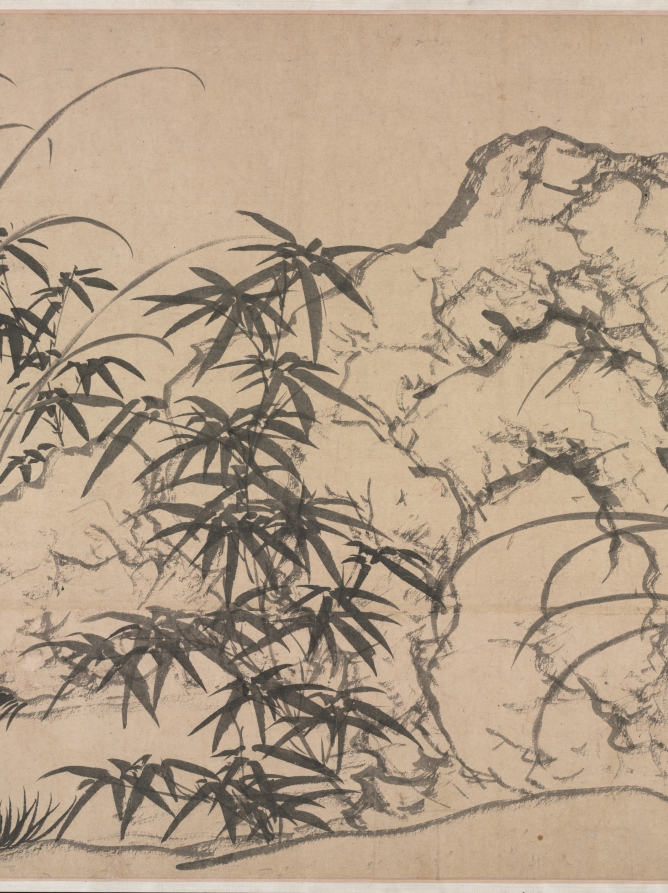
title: Bamboo, Rocks and Lonely Orchids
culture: China, Yuan dynasty (1271-1368)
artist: Zhao Mengfu (Chinese, 1254–1322)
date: 1271–1368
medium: Handscroll; ink on paper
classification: Painting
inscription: 竹石幽蘭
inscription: 孟頫為善夫寫. [印] 趙氏子昂; [印] 松雪齋; [印] 天水郡圖書印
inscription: 古人善書者必能畫點墨作蠅，便自有生意。松雪翁蘭石草聖飛帛筆法皆具，可寶也。安陽韓性 [印]明善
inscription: Colophon 2. Qiu Yuan 仇遠 (1247-after 1328), a respected poet during the Song and Yuan periods. He was linked to, among others, Zhao Mengfu and Gao Kegong. Zhao Mengfu painted a version of Nine Songs 九歌圖 for him, and Gao Kegong dedicated to him a painting titled Mountain Village 山村圖 (current whereabouts unknown). His poem here is also preserved in his collected works.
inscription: Colophon 3. Zheng Yuanyou 鄭元祐 (1292-1364), an erudite scholar and teacher of renown, active in Hangzhou and Suzhou. In the 1350s, when Gu Ying’s literary gatherings were at their peak, he was already elderly and participated in a limited way.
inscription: Colophon 4. Wu Kegong 吳克恭 (active mid-1300s), a friend of Gu Ying and Ni Zan 倪瓚 (1301–1374), a major Yuan painter.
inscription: Colophon 5. Angji 昻吉 (jinshi of 1348), of Western Xia 西夏 origin and a poet of distinction. He wrote an introduction to the painting Literary Gathering at Yushan 玉山雅集圖, of which Zhang Wo was the painter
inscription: Sheet 2. Yuan: friends of Gu Ying Colophon 6. Wang Zifang 王孜方 (active mid-1300s), an official who, at the time of his visits to Gu Ying’s estate, had reached the rank of Minister. He is better known under the name Wang Keju 王可矩.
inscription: Colophon 7. Ke Jiusi 柯九思 (1290–1343), a major official who served in the Kuizhang Pavilion 奎章閣 and as an advisor to Emperor Wenzong in matters of calligraphy and painting.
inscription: Colophon 8. Yu Li 于立 (active mid-1300s), a Daoist recluse, poet, and close friend of Gu Ying, so much so that during his visit to Gu Ying’s estate he was given accommodation in a special pavilion. His poem here is also preserved in Gu Ying’s Cao tang ya ji.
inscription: 至正十一年十月廿八日男奕百拜堇觀 [印] 趙奕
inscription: Colophon 10. Yu Ji 虞集 (1272-1398), a major official and literary figure who also served in the Kuizhang Ge. His poem is recorded in his collected works. The poem is one of a set of four inscribed at the request of Wang Huayu 汪華玉 on Orchids and Rock 蘭石圖 by Zhao Mengfu, obviously a different, long lost, painting. Wang Huayu was an official and a collector (jinshi of 1327). Yu Ji’s colophon here was written before 1348 and during his retirement in Linchuan 臨川, Jiangxi, possibly sent from there. It is possible he had not seen the painting, and his calligraphy here appears to be rather casual and detached, jotting down an old poem without much care, contrary to his earlier practice.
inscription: Colophon 11. Sun Shi 孫時 (mid-1300s–early 1400s), a native of Yuncheng 鄆城, Shandong, and a jinshi of 1390. He may have been quite young when paying a visit to the Yushan gatherings in the late 1340s and early 1350s.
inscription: Colophon 12. Zhang Zhu 張翥 (1287–1368), Qiu Yuan’s disciple and a poet of renown, who enjoyed a belated career in officialdom and was known for his integrity.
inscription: Sheet 4. Yuan and Ming: further friends of Gu Ying; colophon 17 begins the early Ming sequence. Colophon 13. Zhang Wo 張渥 (active c. 1336-after 1364), a frustrated scholar, a poet, and a painter of landscape and figures. An active participant in Gu Ying’s literary circle, he painted the Literary Gathering at Yushan, a pictorial document of the individuals and activities on Gu Ying’s estate. His rendering of Nine Songs is well known, and one version is in the collection of the Cleveland Museum of Art (see 1959.138). His poem here is also found in Gu Ying’s Cao tang ya ji, under the entry “ti Zhao Hanlin mo lan 題趙翰林墨蘭” (inscribed on the Ink Orchid by Zhao the Hanlin academician). This is a rare instance of calligraphy as well as signature by the artist.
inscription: 觀吳興公竹石幽蘭圖使人鄙吝頓消。其筆勢從橫天真爛澷，一出於二王書法。冝仲瑛寳而玩之異於常品也。至正八年十月天台陳基書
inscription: Colophon 15. Zhang Shen 張紳 (active about 1340–after 1385), a respected calligrapher and participant in Gu Ying’s literary gathering. He resided in Kunshan, the same city where Gu Ying’s estate lies. In the third line of the poem, he mentioned Gu Ying’s hao, “Jinsu 金粟.” This was a name he assumed later in life, after the death of his mother in the year 1356. Thus this inscription must have been written after that date.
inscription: Colophon 16. Wang Sun 汪遜 (active mid-14th century), a little-known native of Kuaiji 會稽, who may have been one of the infrequent visitors to Gu Ying’s estate.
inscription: Colophon 17. Hu Guang 胡廣 (1370-1418) is the first Ming colophon writer on this scroll. He was an official of great power in the court and a trusted advisor of Emperor Chengzu; he served as the Grand Academician of the Hall of Literary Profundity 文淵閣大學士 and Grand Academician of the Left Secretariat of the Heir-Apparent 左春坊大學士.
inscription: Sheet 5. Early Ming Colophon 18. Wang Yinshi 王尹實 (active about 1403–about 1424), a native of Siming 四明, Zhejiang, and a minor official and calligrapher.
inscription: Colophon 19. Zhang Yuchu (signed here as “Wuwei 無 為”), the forty-third Heavenly Master of the Zhengyi sect of Daoism. A man of erudition, he was also a poet, painter, and calligrapher. A modified version of the poem here was published in his collected works titled Xian quan ji 峴泉集. A slight modification in the first line is the only change: “Wu xing miao yao nian bing xue zi 吳興玅年氷雪姿.”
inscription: Colophon 20. Yao Guangxiao 姚廣孝 (1335-1418), a Buddhist monk, scholar, and counselor to Chengzu in his successful attempt at usurpation of the throne. Yao Guangxiao was a controversial figure but wielded enormous power.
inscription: Sheet 6. Wang Ning alone Colophon 21. Wang Ning 王寧 (d. 1411) signed as “Qingzhen 清真” in this colophon. One of the three seals reveals his identity as the Yongchun Hou 永春侯 [Marquis of Lasting Spring] (appointed 1402), and the husband of Princess Huaiqing 懷慶公主 (1328-1398), the sixth daughter of the founder of the Ming dynasty, Zhu Yuanzhang. This colophon postdates 1402.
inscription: Sheet 7. Mid-Ming Colophon 22. Ou Yi’an 區易安 (active first half of 15th century), unknown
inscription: Colophon 23. Chen Lian 陳璉 (1370-1454), a native of Dongguan 東莞, Guangdong 廣東, and an official admired for his erudition and perspicacity. In view to the known calligraphic style of Chen Lian, this colophon appears to be a transcription and not written by him.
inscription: Colophon 24. Wei Ji 魏驥 (1374-1471) enjoyed longevity (he lived to the age of ninety-eight) and an extended length of service as an official. A jinshi of 1406, he eventually became the Minister of Personnel in Nanjing 南京吏部尚書. The colophon here is dated 1434, when he was invited to view the painting by the Court Musician Mo Zhizhong 莫至翀, its owner. Again, in view of its calligraphic style, this was not written by him, but is a transcription from the original.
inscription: Colophon 25: Zhang Yi 章鎰 (active 1462-1473), a Ningbo native and an official with a reputation for courage and integrity.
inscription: Sheet 8. Further mid-Ming Colophon 26. Yin Zhi 尹直 (1427-1511), a controversial figure in Ming politics in spite of his erudition and high position as the Minister of War 兵部尚書.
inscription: Colophon 27. Zou Yu 鄒虞 (active 1460-1520; jinshi of 1490), a native of Hangzhou. In 1510, he was appointed Administrative Vice Commissioner in Guangdong.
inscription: Sheet 9. Xu Shouhe 徐守和 alone Colophon 28. Xu Shouhe 徐守和 dated his entry in 1629. Since he wrote it in his own studio, The Lesser Qingbi Pavilion 小清閟, he was likely the owner of the scroll. Xu’s life is not well documented; he was a connoisseur of note during the last years of the Ming dynasty rule. He may have acquired the Cleveland scroll from Wu Ting, whose seals appear here.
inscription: Sheet 10. The mounter’s note. Xu Shudong 徐曙東 of Jiaxing 嘉興 made the remounting on the first day of sixth month, 1802.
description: Bamboo and orchids are motifs associated with the virtues of the scholar-official. Bamboo that bends but does not break stands for moral integrity, endurance, and loyalty. Wild, fragrant orchids that bloom in the shadow symbolize modesty and the aura of learnedness. Rocks are often considered to be miniature versions of mountains that form the universe. This monochrome ink painting is brushed on paper in a masterfully calligraphic manner. While the rocks are delineated in chalky, dry strokes showing the effect of flying white (feibai), the bamboo and orchids are drawn with a swift brush demonstrating the virtuosity of the artist.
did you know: One of the many inscriptions records that the handscroll was last remounted by Xu Shudong 徐曙東 of Jiaxing 嘉興 in 1802.